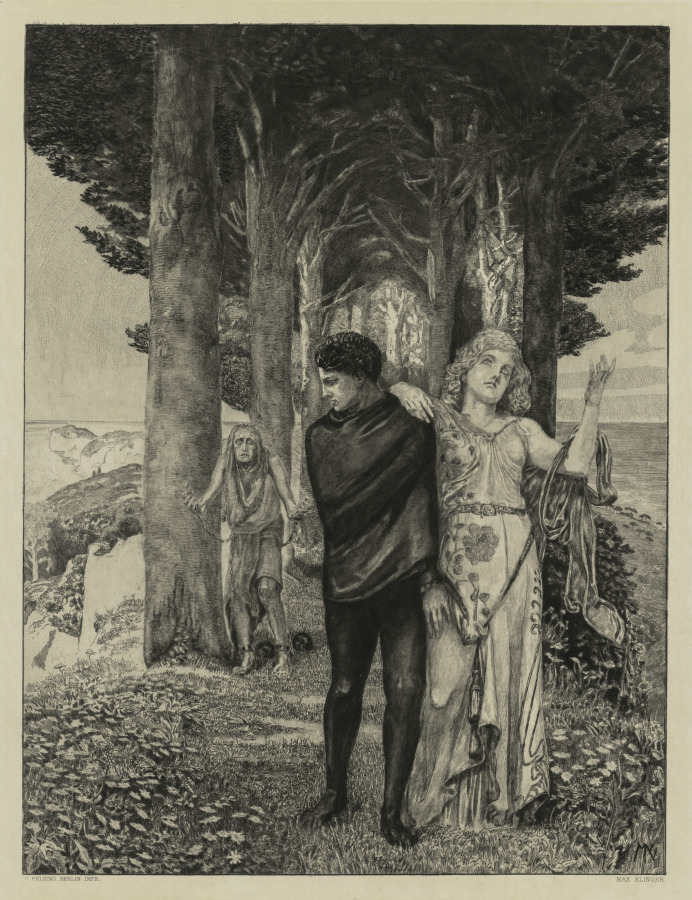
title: On Death Part Two, Opus XIII Print 4: Genius (Artist)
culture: Germany, 20th century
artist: Max Klinger (German, 1857–1920)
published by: Felsing, Berlin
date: 1903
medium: etching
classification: Print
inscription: In plate, within image, lower right corner: MK; in plate, below image, printed in black ink, lower left corner: 0 FELSING BERLIN IMPR.; lower right corner: MAX KLINGER